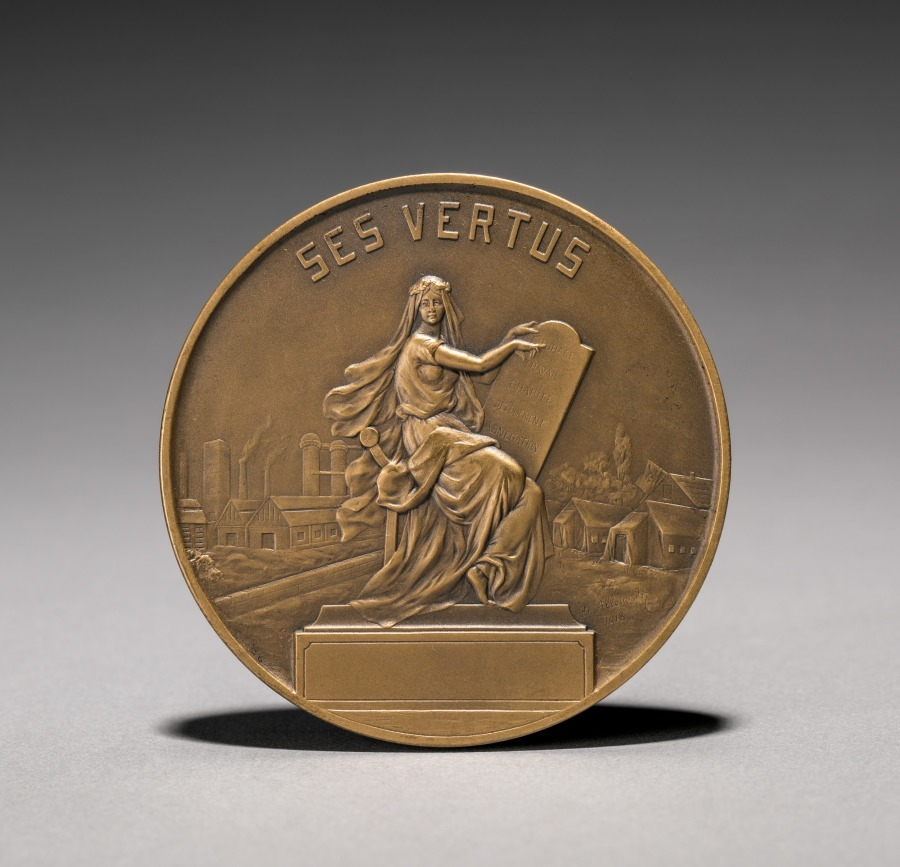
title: Medallion (reverse)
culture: France, 19th-20th century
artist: Henri Emile Allouard (French, 1844–1929)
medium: bronze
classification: Metalwork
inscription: "Ses vertus, courage, travail, charity, devouement, abnegation" (Her virtues, courage, work, charity, self-sacrifice, sef-denial); signed: "H. Allouard 1918."